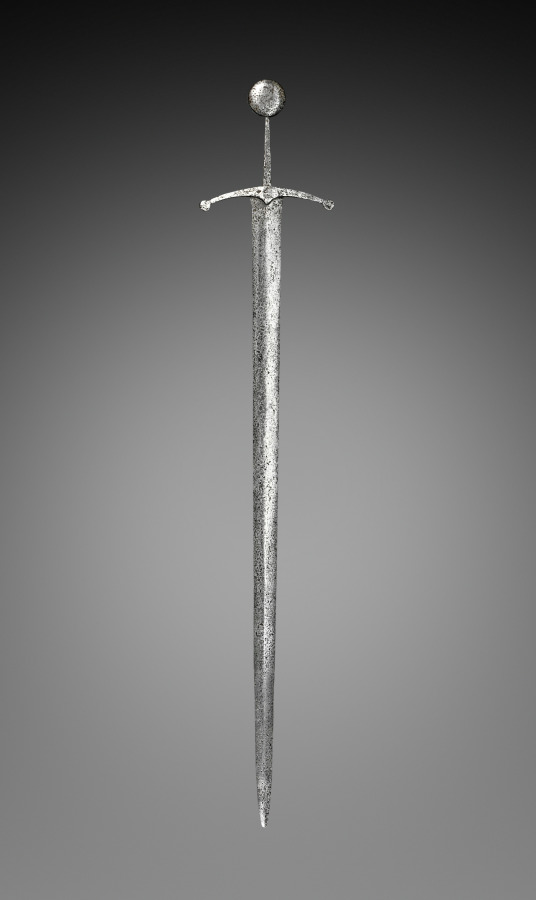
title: Sword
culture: European (unassigned), 15th century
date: 1400s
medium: steel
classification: Arms and Armor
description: The European sword is derived from the ninth-century Viking sword, which consisted of a straight double-edged blade and was suitable for slashing or thrusting. Throughout the medieval period swords became increasingly specialized weapons depending on whether it was intended to be used on horseback or on foot. A knight likely owned several swords according to his needs and preferences. Craftsman sought to achieve the technical superiority that in turn would provide his client with a distinct advantage.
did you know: Although now lost, this sword would have had a scabbard or sheath made of wood covered in leather to protect it from water so it wouldn't rust when not in use.